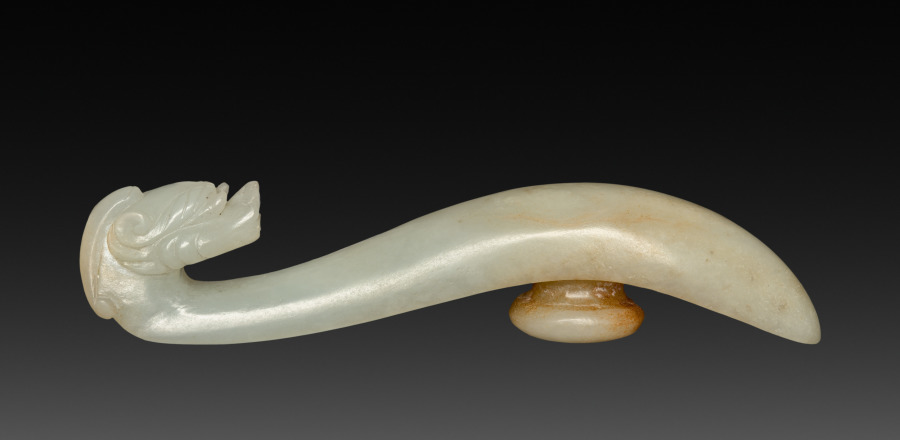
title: Belt Hook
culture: China, Qing dynasty (1644-1911)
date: c. 1700s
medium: jade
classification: Jade